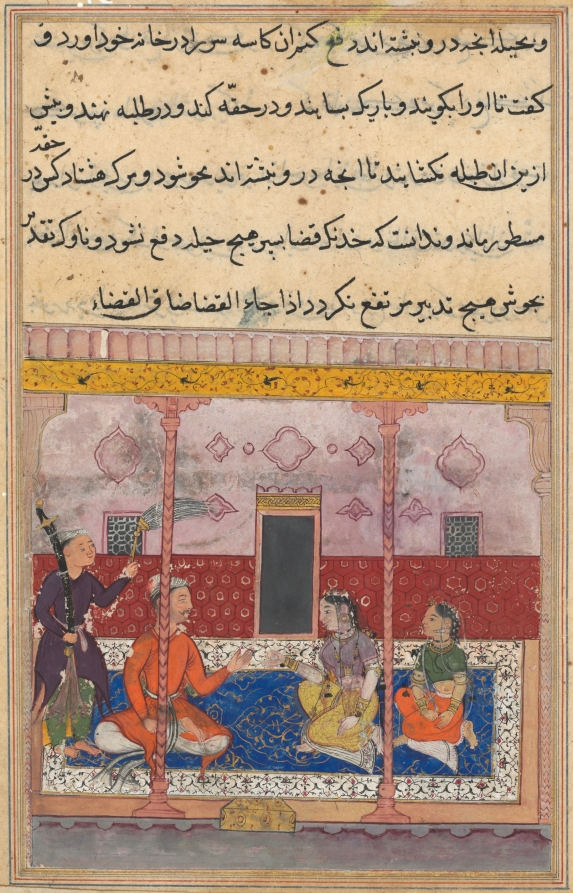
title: The merchant has the hateful skull ground and put into a box, from a Tuti-nama (Tales of a Parrot): Twenty-third Night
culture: Mughal India, court of Akbar (reigned 1556–1605)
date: c. 1560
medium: gum tempera, ink, and gold on paper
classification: Painting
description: A small, yellow box rests on the ground in the center foreground of the image. Inside are the remains of a skull inscribed with a warning that it had caused the death of eighty men and would cause the death of eighty more. The merchant, on the left, had the skull destroyed, unaware that his actions could not circumvent fate.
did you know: This story takes place in Tabriz, capital of Iran’s Safavid Empire from 1501 to 1555.